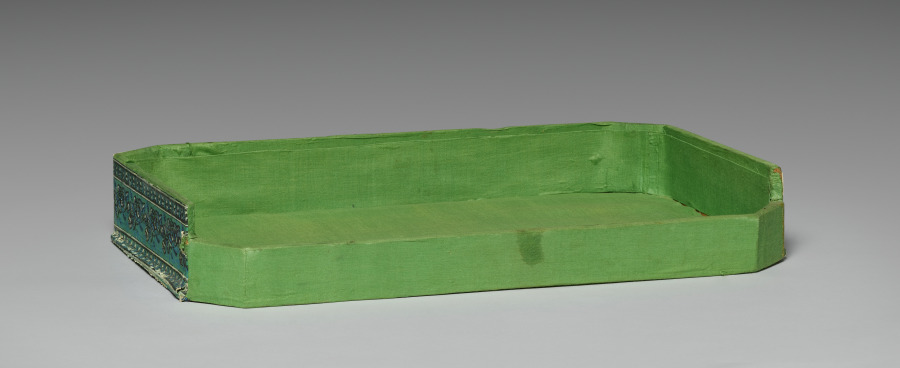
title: Chest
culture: Italy, Venice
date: 1700s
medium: leather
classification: Miscellaneous